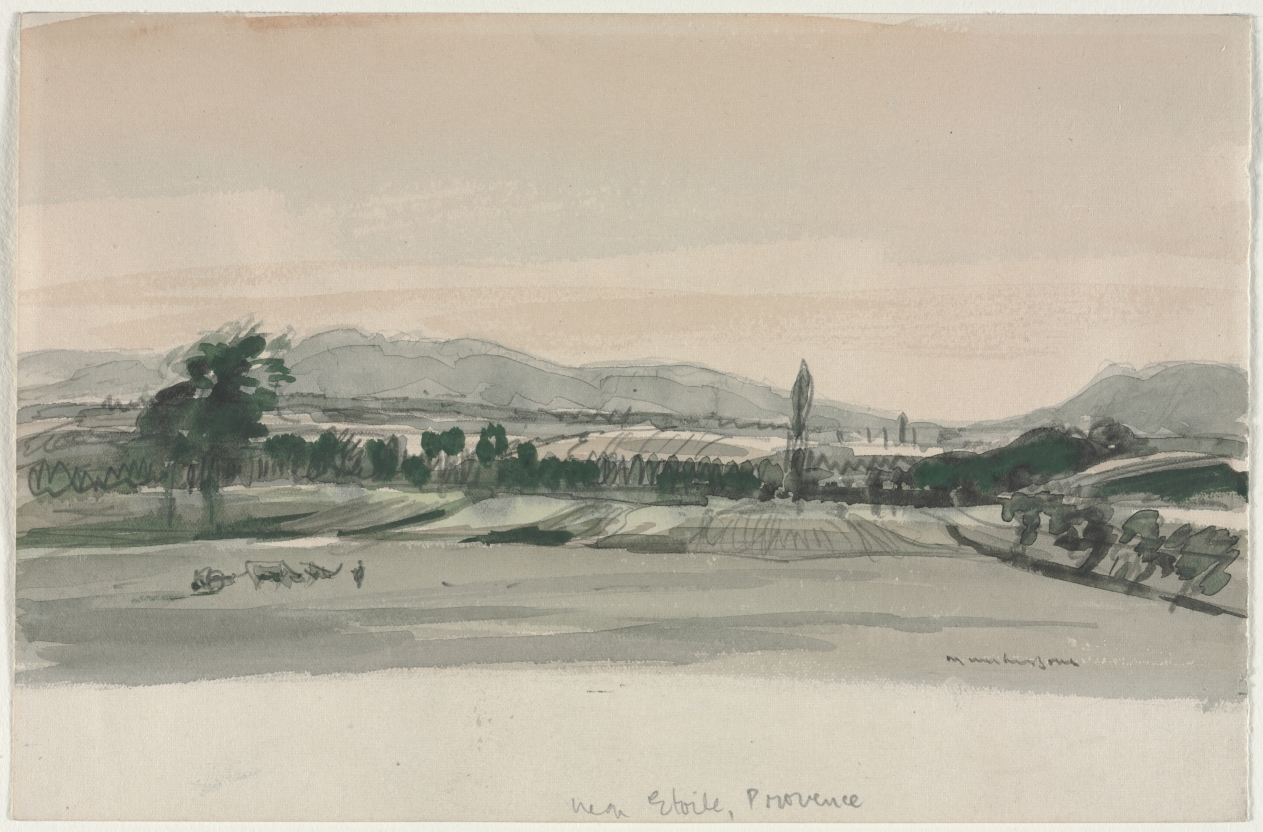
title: Near Étoile, Provence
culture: England, 20th century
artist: Muirhead Bone (British, 1876–1953)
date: c. 1896–1953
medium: watercolor over graphite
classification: Drawing